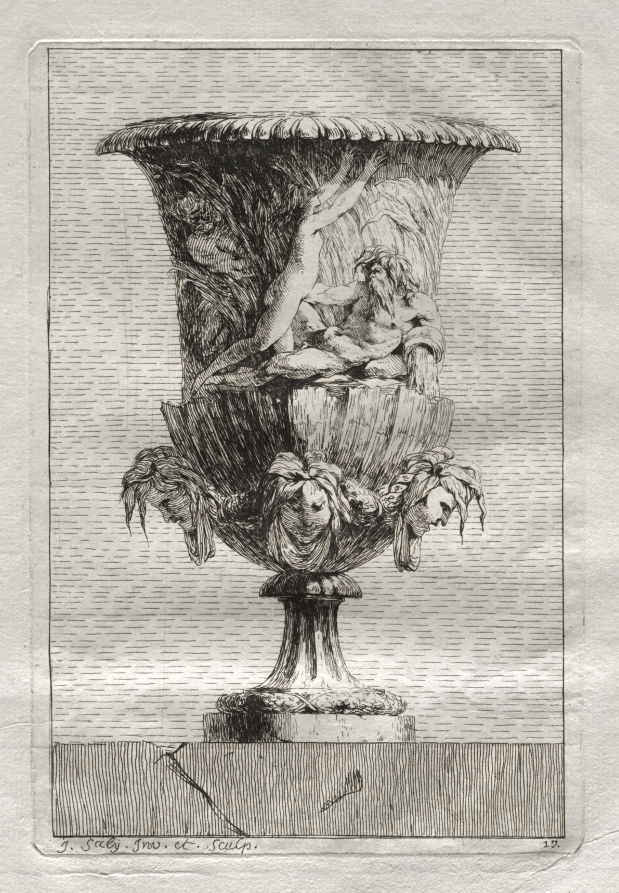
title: Suite of Vases: Plate 17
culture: France, 18th century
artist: Jacques François Saly (French, 1717–1776)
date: 1746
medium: etching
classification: Print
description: Designing ornamental vases or urns was particularly popular during the mid-18th century since the only limit to the possibilities was the imagination of the artist. Saly, a sculptor by training, was a student at the French Academy in Rome from 1740 to 1746, at which time he published a set of 30 etchings. Saly began with basic antique vase forms but deviated from classical ornament to use a rich variety of fantastic creatures for embellishment.